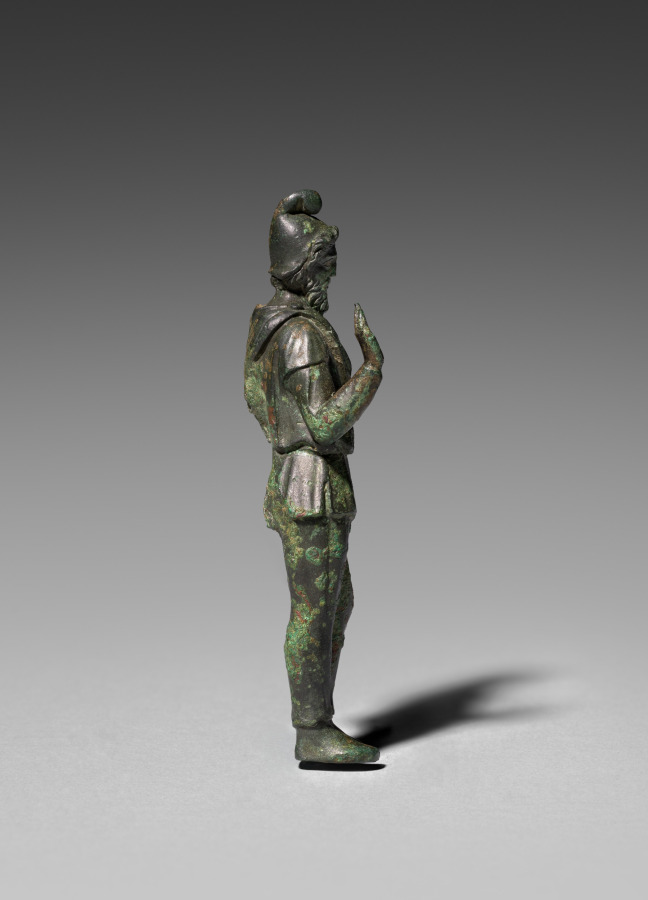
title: Barbarian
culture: Italy, Rome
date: 1–100 CE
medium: bronze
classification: Sculpture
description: This bearded figure wears a tunic, trousers, and a soft conical hat with the apex bent over, called a Phrygian cap. He stands with his right hand raised (missing the index and little finger) and his left leg slightly bent. The figure originally held an implement in his lowered left hand, whose fingers curve around a shaft. The garments and cap identify him as a foreigner, likely a Dacian. Emperor Trajan (reigned AD 98–117) fought two military campaigns against Dacia (modern-day Romania), where he conquered and annexed the southern half of the region.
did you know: This figure may have decorated an ornate parade breastplate on a horse.